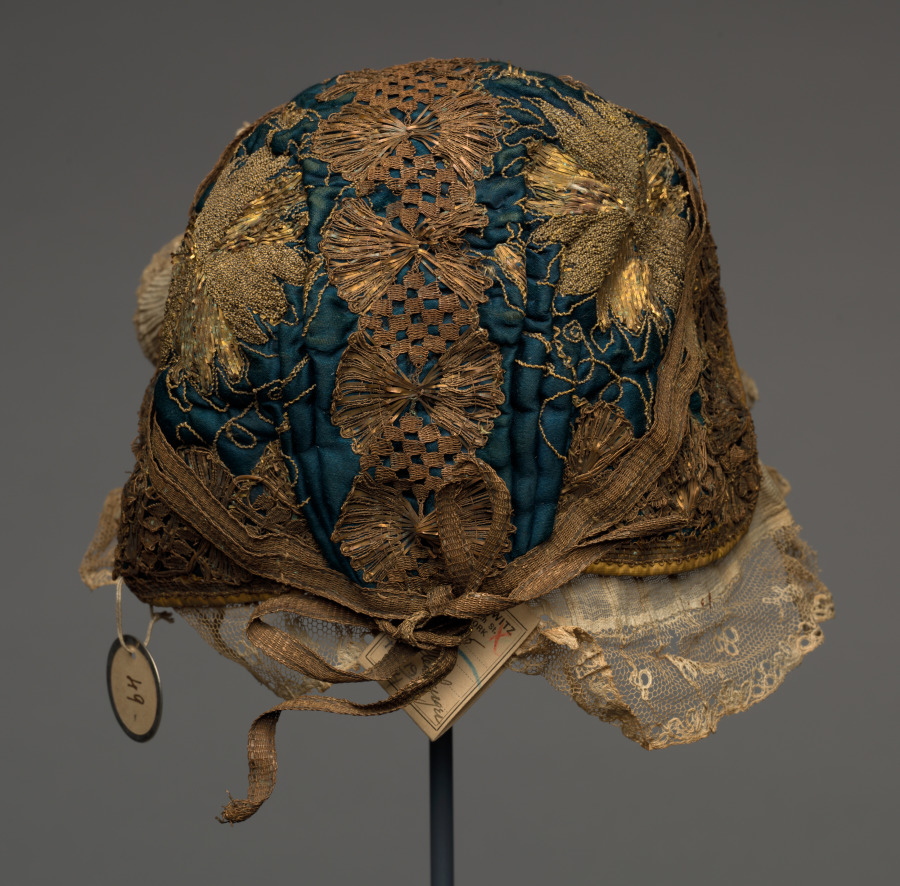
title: Embroidered Cap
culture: Germany, Mecklenburg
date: 1700s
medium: embroidery; satin ground embroidered with gold thread and decorated with gold lace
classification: Garment